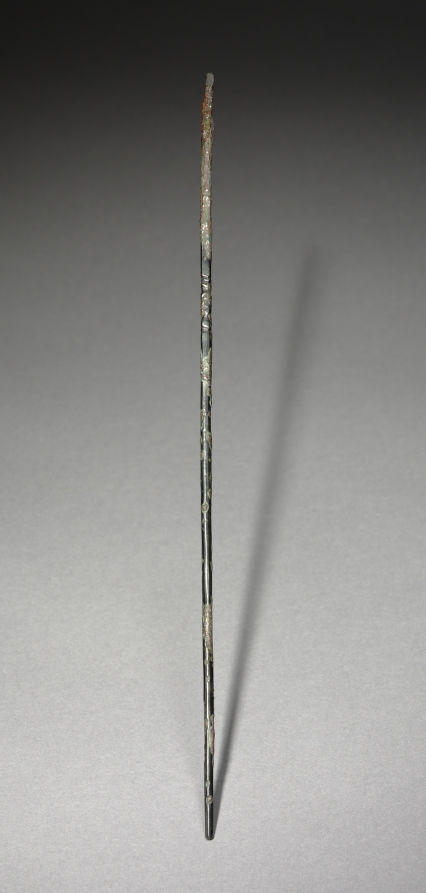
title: Chopstick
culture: Korea, Goryeo dynasty (918–1392)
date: 918–1392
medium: bronze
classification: Metalwork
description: In Korea, chopsticks made of metal such as brass, silver, and gold were excavated from ancient tombs and ruins dated to the 6th century at the earliest. Burial goods often include utilitarian objects such as table wares and utensils because the dead were believed to need them in the afterlife.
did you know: In contrast to the Chinese and Japanese, Koreans still prefer metal chopsticks (stainless steel and brass) to wooden ones.